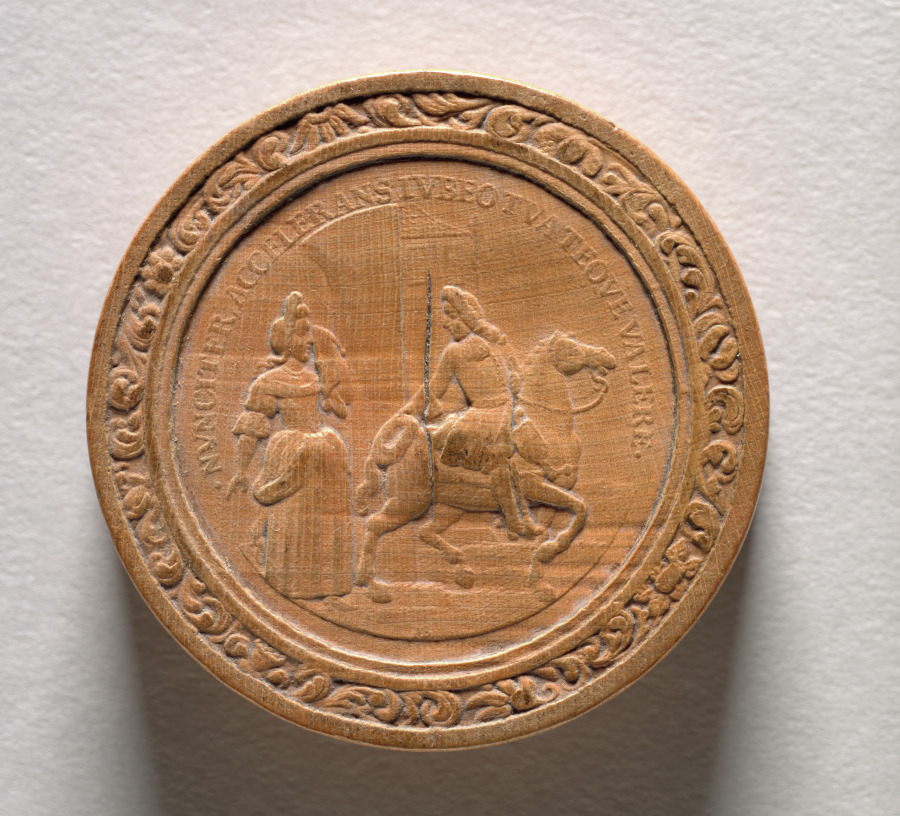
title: Gaming Piece (obverse)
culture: Germany, late 17th-early 18th Century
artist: Martin Brunner (German, 1659–1725)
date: c.1700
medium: wood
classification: Furniture and woodwork